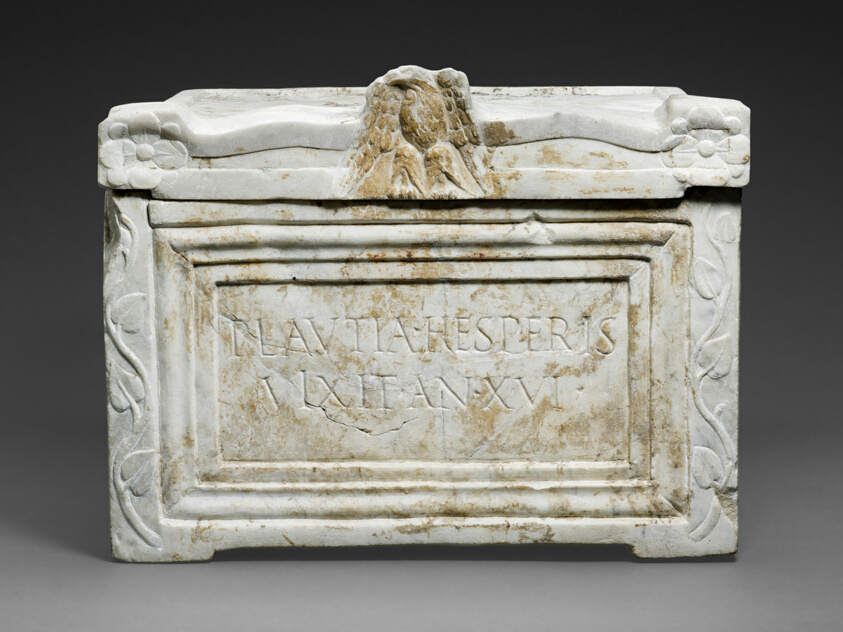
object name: Funerary Object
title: Cinerary Urn of Plautia Hesperis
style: roman (ancient, style or period), ancient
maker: Roman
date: 1st century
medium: Marble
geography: Italy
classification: stone; vessel; ancient art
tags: writing